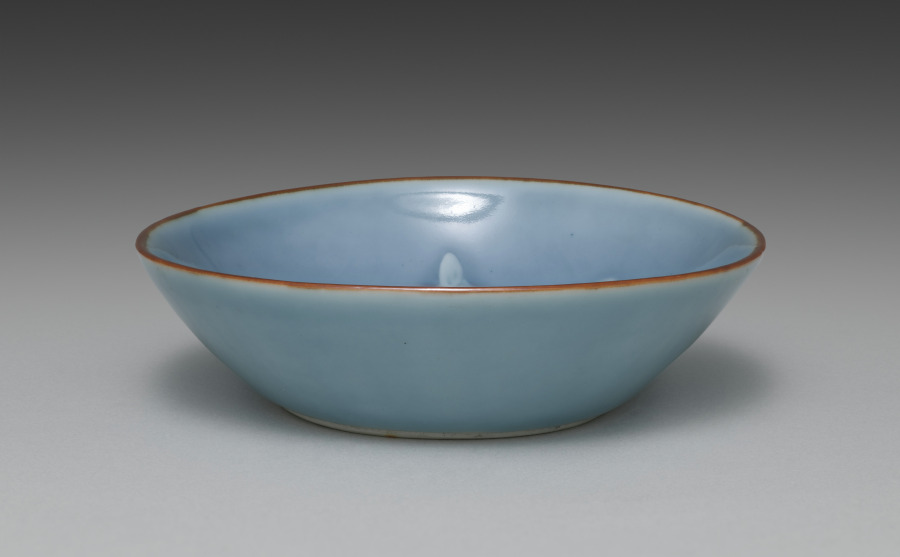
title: Dish from Dishes with Shells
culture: Japan, Taishō period (1912–26)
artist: Seifū Yohei IV (Japanese, 1872–1951)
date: 1914–46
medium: One from a set of five dishes; porcelain with blue glaze, iron oxide, and molded design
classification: Ceramic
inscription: 清風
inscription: 清風造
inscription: 清風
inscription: 成山清風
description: Yohei IV chose an aquatic theme for this set of five mukōzuke, side dishes. He added an iron oxide rim and used a concentrated blue glaze on both the interior and exterior. The glaze, named on the box lid, is his father’s “evening moon” (tsukiyoi) color. The conch in relief takes up the entire bottom of the dish. Up the sides are two snails on one end and on the other a scallop. This results in a boldly graphic, less realistic effect.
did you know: This set of dishes, mukōzuke, could be used for serving small side dishes at a tea gathering.